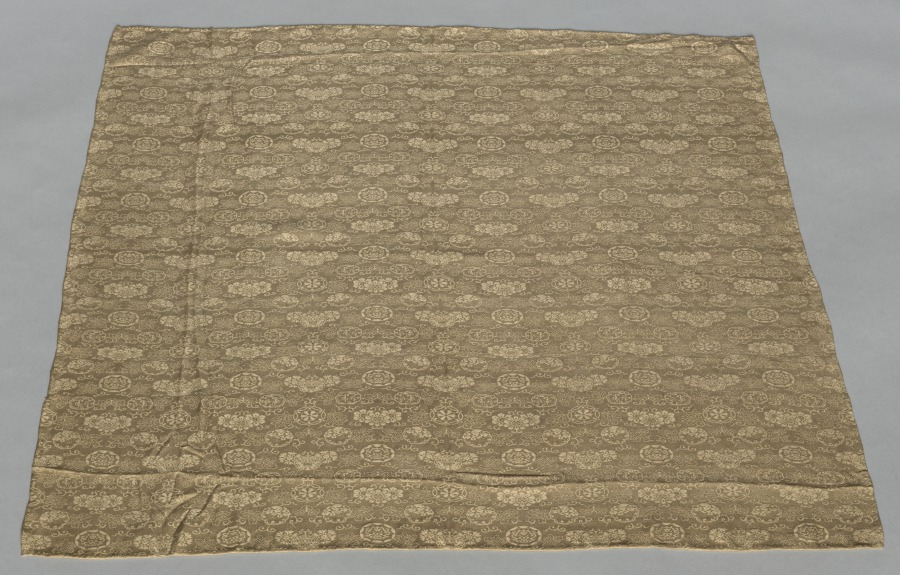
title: Fragment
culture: China, 19th century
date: 1800s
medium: silk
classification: Textile